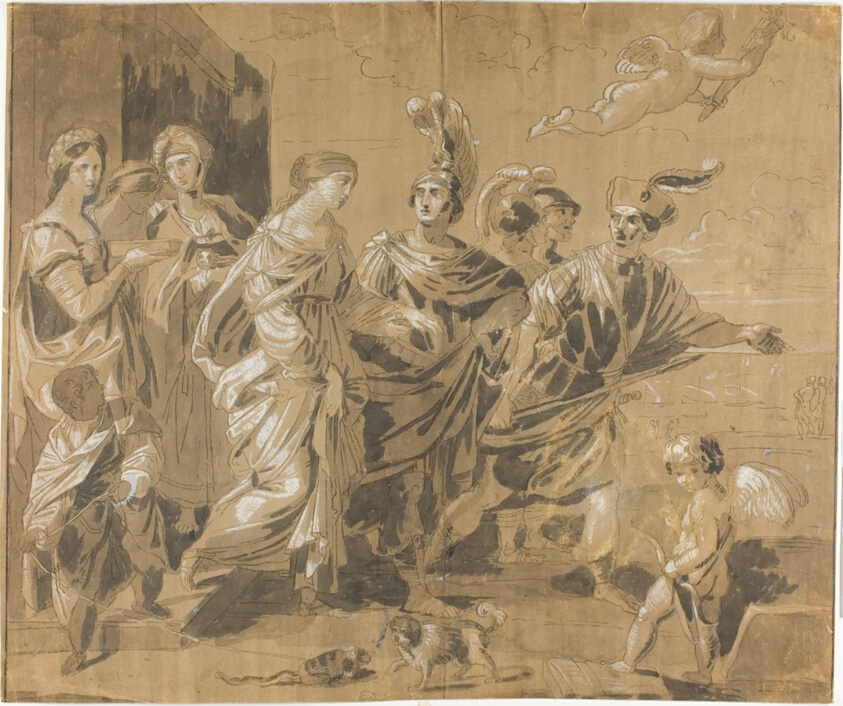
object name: Drawing and Watercolor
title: Abduction of Helen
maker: after Guido Reni; Italian, 1575-1642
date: after 1627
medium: Pen and brown ink, with brush and brown and gray wash, heightened with lead white (partially oxidized), on cream laid paper prepared with brown wash, laid down on cream laid paper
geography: Italy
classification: drawings (visual works); prints and drawing